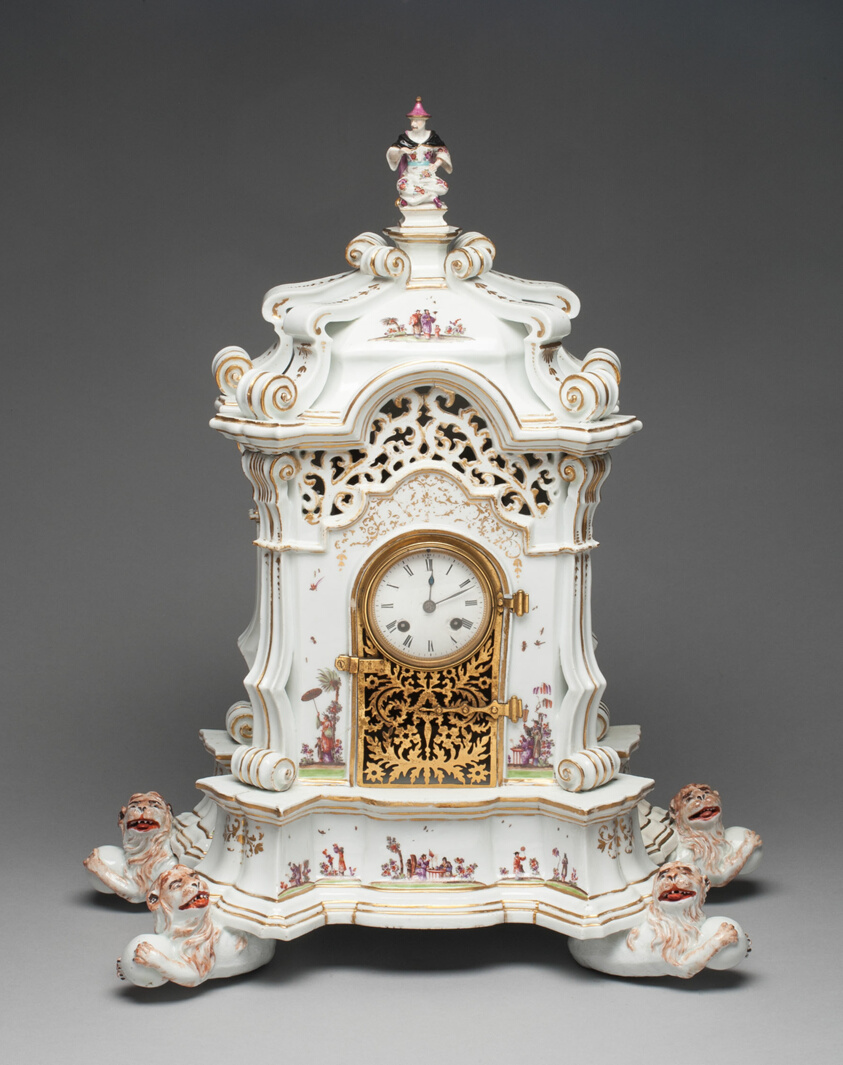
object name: Ceramics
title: Clock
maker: Meissen Porcelain Manufactory; German, founded 1710; Modeled by George Fritzsche (German, 1681-1709); Painted in the manner of Johann Gregor Höroldt (German, active 1720-56; 1763-65)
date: 1727–30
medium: Hard-paste porcelain, polychrome enamels, and gilding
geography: Meissen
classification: porcelain; ceramics; european decorative arts